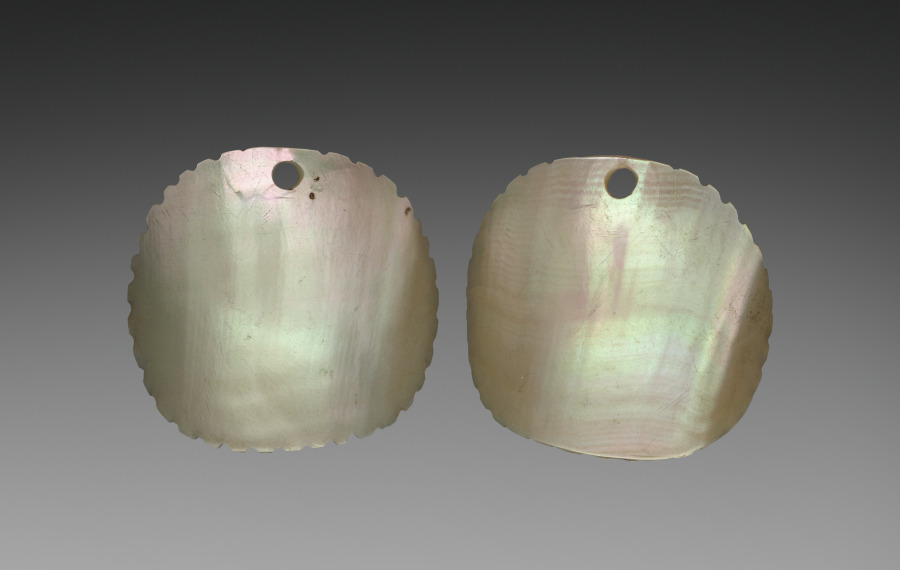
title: Pair of Earrings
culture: probably Malacian or South Sea Islands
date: before 1916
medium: mother-of-pearl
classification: Jewelry